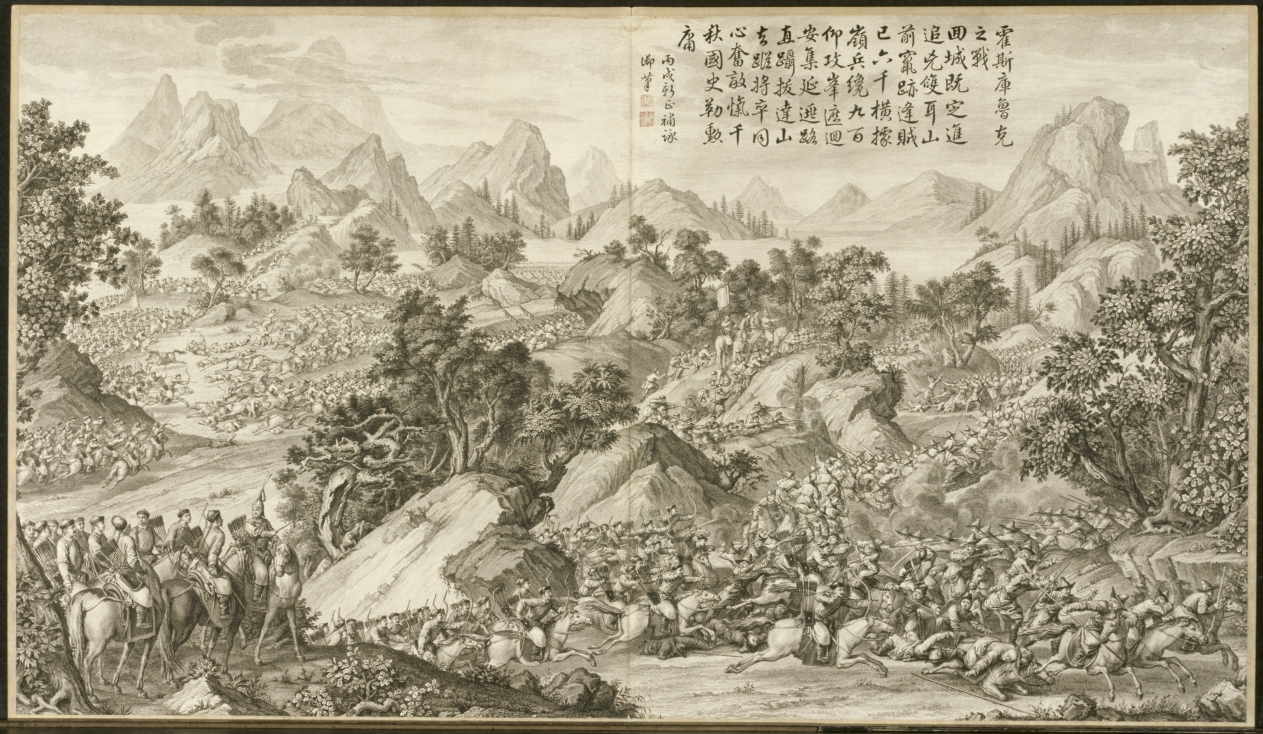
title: Battle at Heshi Kuluke: from Battle Scenes of the Quelling of Rebellions in the Western Regions, with Imperial Poems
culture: China, Qing dynasty (1644–1911), Qianlong reign (1736–95)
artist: Jean Damascene Sallusti (Italian, d. 1781)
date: c. 1765–74; poem dated 1766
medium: etching, mounted in album form, 16 leaves plus two additional leaves of inscriptions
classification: Print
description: This set of etchings was commissioned by Emperor Qianlong to record in pictorial terms the courage of his generals and soldiers in quelling the rebellions in the Western Regions. Qianlong added his own poem to each of the etchings, indicating his appreciation and pride in this demonstration of military might. "Western Regions" refers to the present-day Xingjiang province, often described in Western writing as "Central Asia."